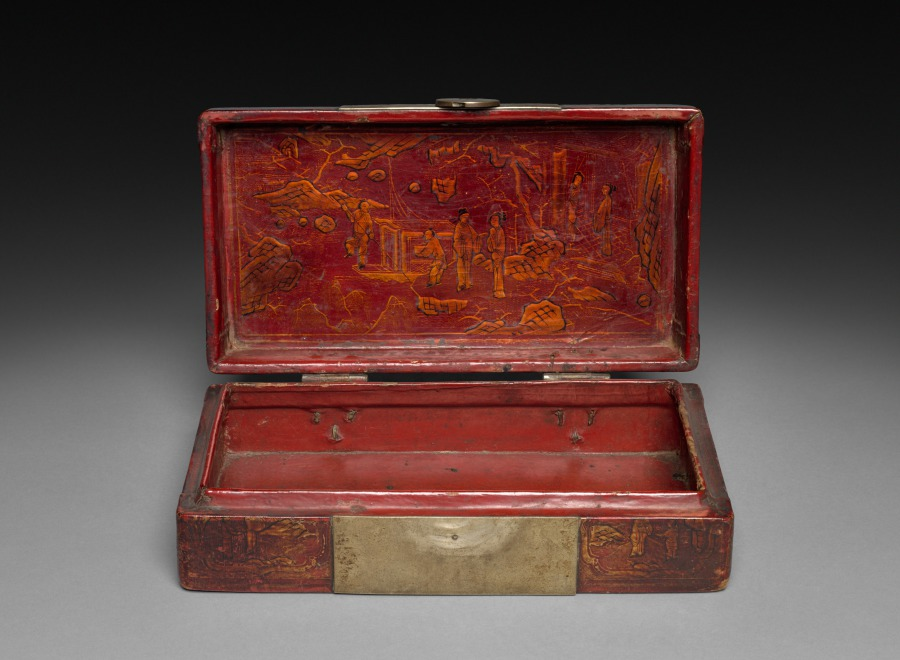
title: Box with Hinged Lid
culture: Japan, Edo period (1615–1868)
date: 1700s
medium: lacquer; metal hinges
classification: Lacquer